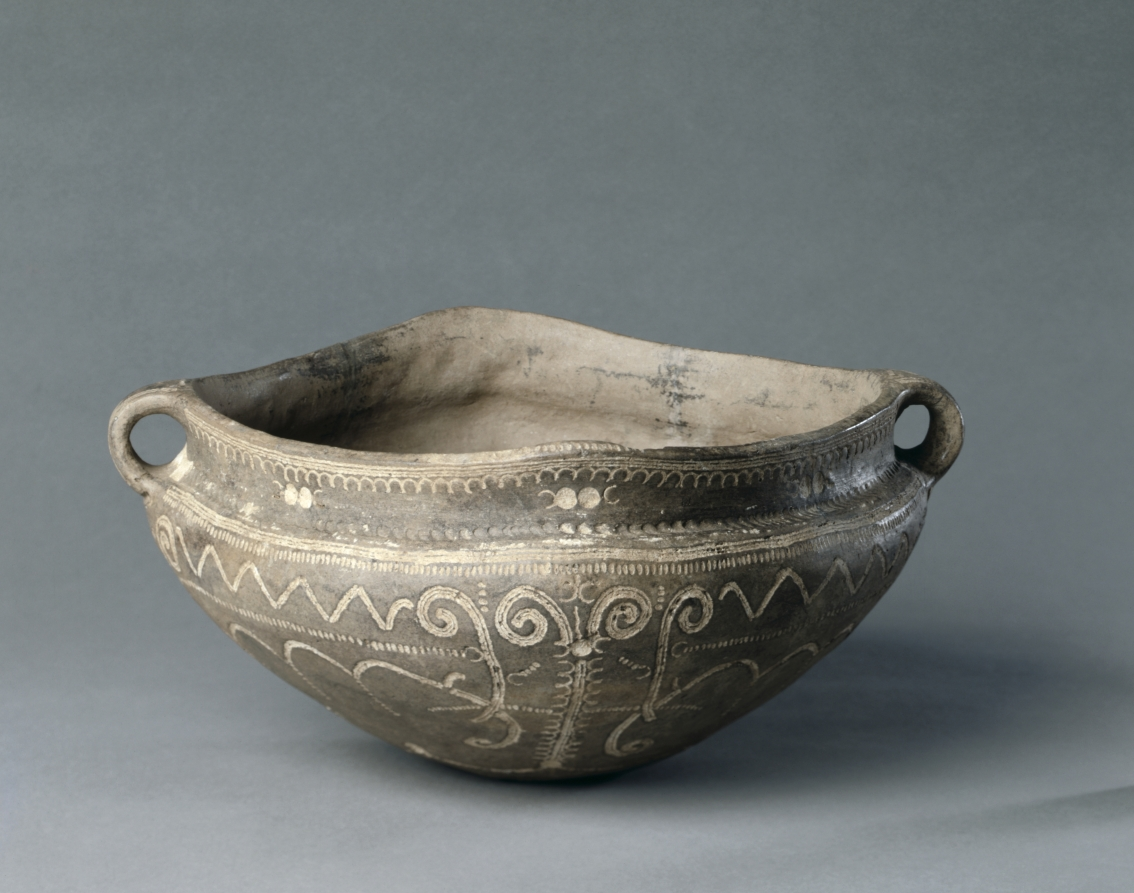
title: Large Bowl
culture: Romania, possibly Cirna, middle Bronze Age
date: c. 1500 BCE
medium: burnished earthenware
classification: Ceramic